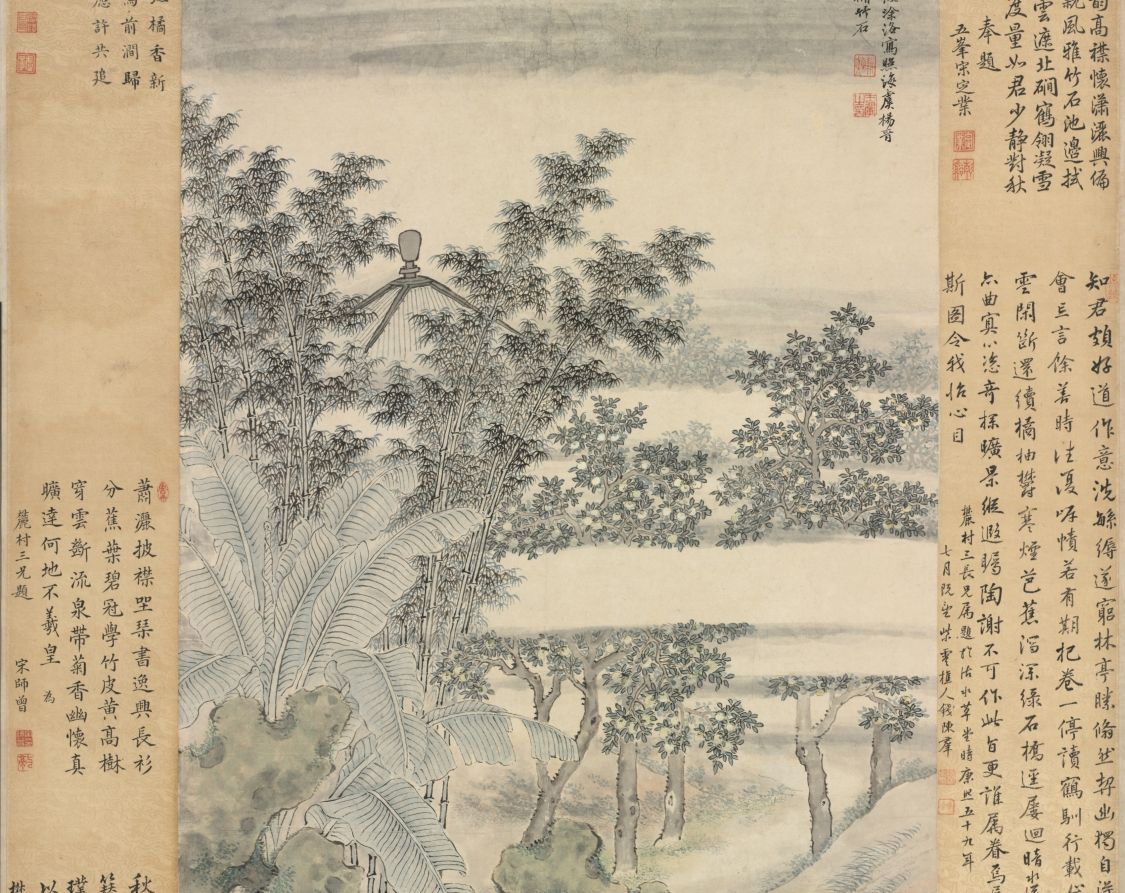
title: Portrait of An Qi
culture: China, Qing dynasty (1644-1911)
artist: Wang Hui (Chinese, 1632–1717)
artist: Tu Luo (Chinese, active c. 1715)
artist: Yang Jin (Chinese, 1644–1728)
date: 1715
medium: hanging scroll; ink and color on paper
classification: Painting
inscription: [印]上下千年. 麓村高逸：康煕乙未季春，廣陵涂洛寫照，海虞楊晉布景，八十四叟王翬補竹石。[印]耕煙; 王翬之印.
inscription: 俯視塵寰逸韻高，襟懷潚灑興偏豪。/ 琴書座右親風雅，竹石池邊拭羽毛。/ 蕉葉亂雲遮北礀，鶴翎凝雪戀東皋。/ 翩翩度量如君少，靜對秋江萬斛濤。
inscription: 知君頗好道，作意洗緐縟。/ 遂窮林亭勝，翛然契幽獨。/ 自得會忘言，餘善時往復。/ 岸幘若有期，把卷一停讀。/ 鶴馴行載正，雲閑斷還續。/ 橘柚欎寒煙，芭蕉瀉深綠。/ 石橋逕屢迴，暗水流亦曲。/ 真心恣奇探，曠景縱遐矚。/ 陶謝不可作，此旨更誰屬。/ 眷焉展斯圖，令我怡心目。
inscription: 逸興迥絶塵，風流仰高躅。/ 側無鹿角巾，横呈豹皮褥。/ 胸藏山壑富，座列琴囊足。/ 橙懸萬顆黄，蕉散一叢綠。/ 泉清鶴景長，樹遠雲光續。/ 披圖識性情，伊人温似玉。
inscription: 風雅出塵寰，披圖見一斑。/ 橘香新雨後，竹影夕陽間。/ 流水鳴前澗，歸雲渡遠山。/ 幽棲如可遂，應許共追攀。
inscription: 蕭灑披襟坐，琴書逸興長。/ 衫分蕉葉碧，冠學竹皮黄。/ 高樹穿雲斷，流泉帶菊香。/ 幽懷真曠達，何地不羲皇。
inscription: 秋色滿林壑，孤琴獨玄閒。/ 境歸簪紱外，道在水雲間。/ 棄智如藏璞，栖心静若山。/ 看君此圖畫，永以謝塵顏。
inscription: 修竹叢蕉坐綠天，君容早歳已如仙。/ 山中寄謝王摩詰，頭白方知住輞川。/ 千樹勝封萬戸侯，西風載滿李衡舟。/ 看君高致輕軒冕，坐享江鄉富貴秋。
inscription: 6 seals unidentified.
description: An Qi, the subject of the portrait, was a second-generation salt merchant from Korea. He used part of his wealth to collect art. At the time this painting was commissioned, An was less than 40 years old. He is represented as a Daoist recluse in nature, informally dressed with attributes such as books and a wrapped guqin instrument, a portrait convention for literati-scholars since the Six Dynasties period (220–589 CE). The local Taihu rock, banana plants, and crane suggest a southern garden and a life in seclusion. An’s portrait is evidence of merchants aspiring to the scholar-official class. According to the inscription, this painting was the joint effort of three men, the eldest and most famous was Wang Hui. While the garden setting is homogenous in style, it contrasts with the application of opaque pigments and shading employed for the depiction of An Qi’s face.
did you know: Seven of An Qi's close friends wrote poetic inscriptions on the silk brocade mount around his portrait.